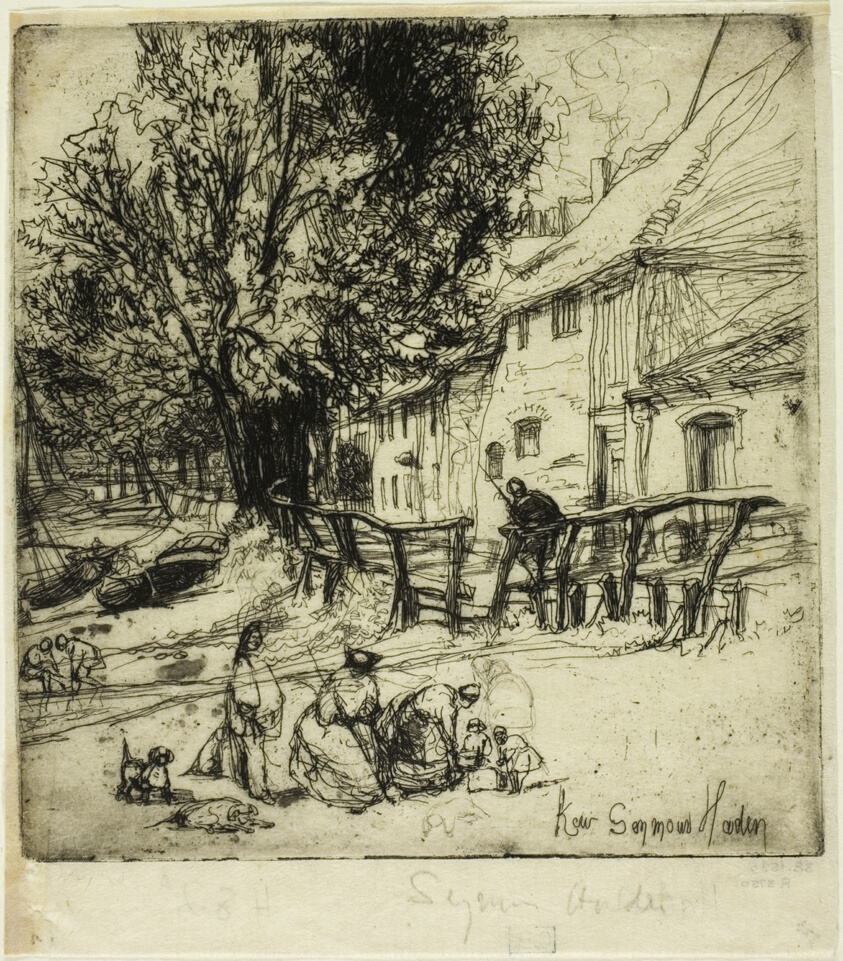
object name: Print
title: Kew Side, A Fragment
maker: Francis Seymour Haden (English, 1818-1910)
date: 1864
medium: Etching on ivory Japanese paper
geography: England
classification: etching; print; prints and drawing